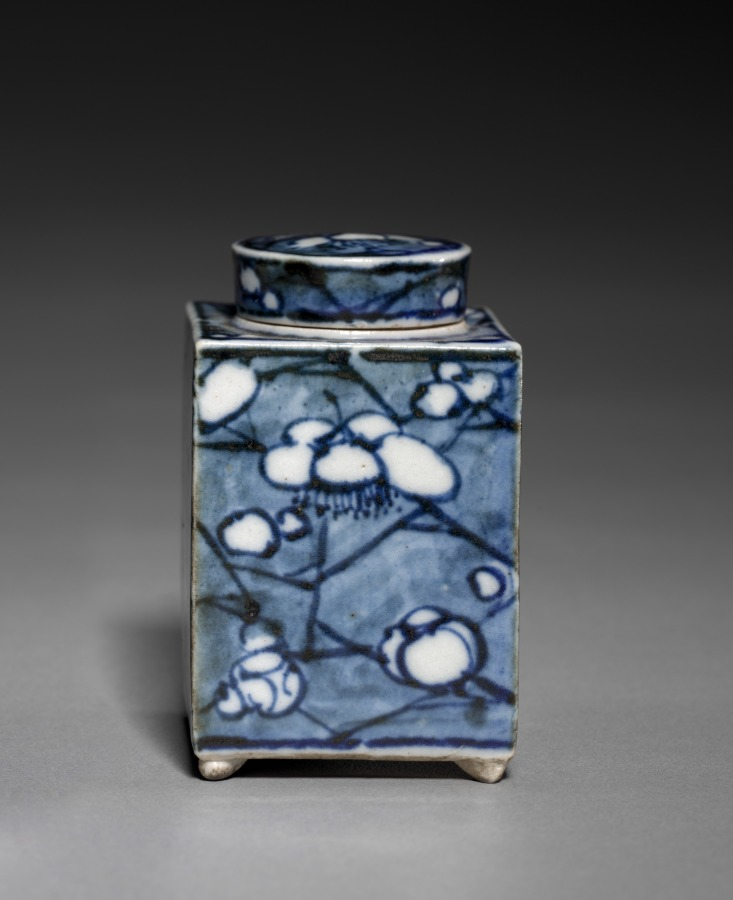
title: Tea Container with Plum Blossom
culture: Japan, Edo period (1615–1868)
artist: Aoki Mokubei (Japanese, 1767–1833)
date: early 1800s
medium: porcelain with underglaze blue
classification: Ceramic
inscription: signed "Ro Mokubei" on base in underglaze blue.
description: Aoki Mokubei, born into a family of restaurateurs, was a potter, calligrapher, painter, and scholar, and is considered one of the three masters of later Edo period Kyoto ceramics. He specialized in porcelains fashioned after Chinese prototypes, and created works for steeped tea (sencha) such as these matching tea caddies decorated in an underglaze blue called sometsuke—literally “with applied dye.” He signed them on their bottoms. They also have intricately patterned silk sleeves to both beautify and protect them. On the exterior of the lid of the outer wooden box that contains them, it is written that Mokubei inscribed and painted an image on the box. On the interior of the lid, the signature and seals of a former owner are written. Mokubei has signed the lid of the inner box, and a charming ink and light color composition of West Lake in Hangzhou in China covers its three sides. On the fourth side is a long inscription by Mokubei describing the scene.